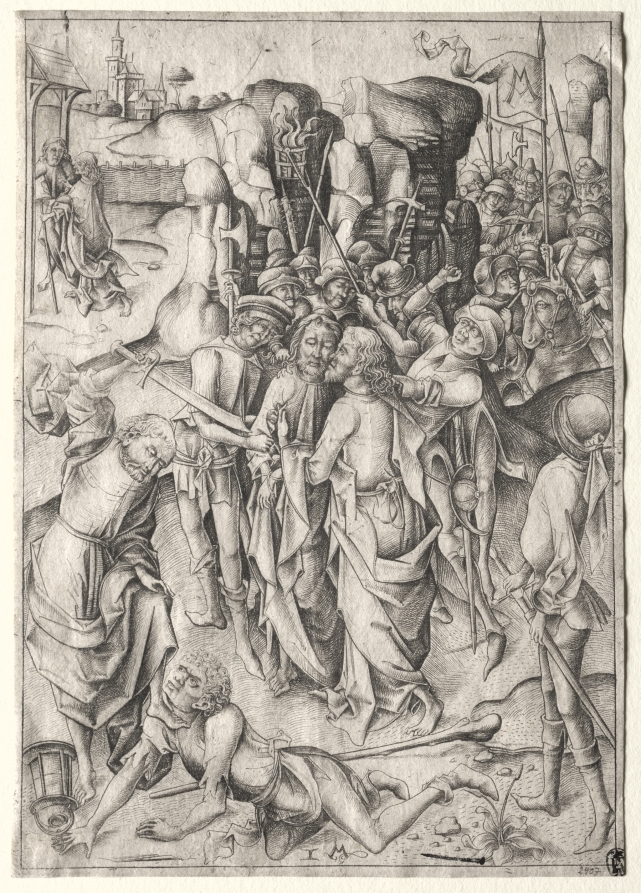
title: The Passion: Christ Taken Captive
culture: Germany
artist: Israhel van Meckenem (German, c. 1440–1503)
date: c. 1480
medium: engraving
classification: Print